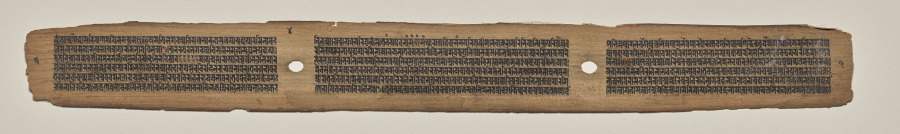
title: Text, Folio 4 (verso), from a Manuscript of the Perfection of Wisdom in Eight Thousand Lines (Ashtasahasrika Prajnaparamita-sutra)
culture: Eastern India, Bihar, Vikramashila Monastery. Painting: Nepal, Kathmandu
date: Sunday, September 14, 1119 (year 239 of the Newar Samvat in the month of Ashvina)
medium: gum tempera and ink on palm leaves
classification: Painting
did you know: This manuscript was clearly numbered in Nepal, evidenced by the numerals found on the versos.